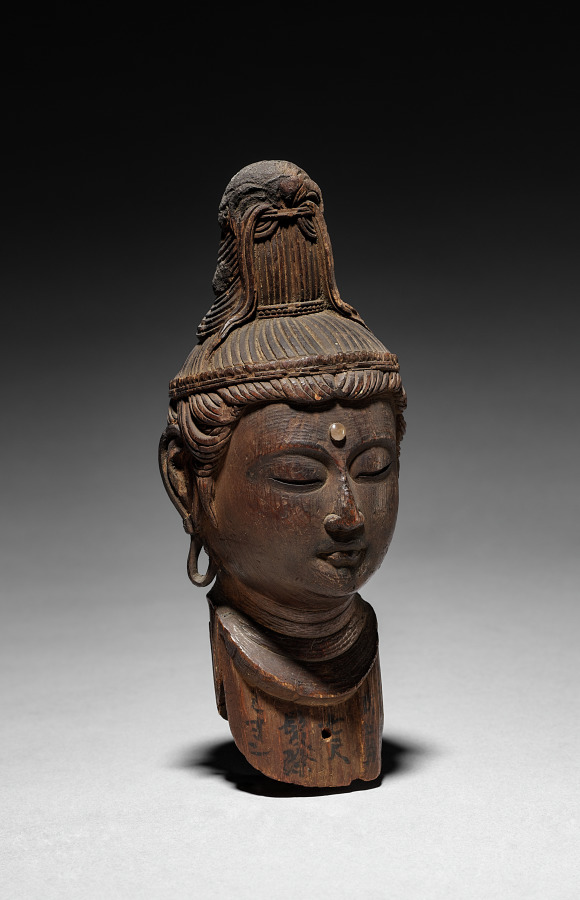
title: Head of Kannon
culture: Japan, Edo period (1615–1868)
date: late 1600s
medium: wood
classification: Sculpture